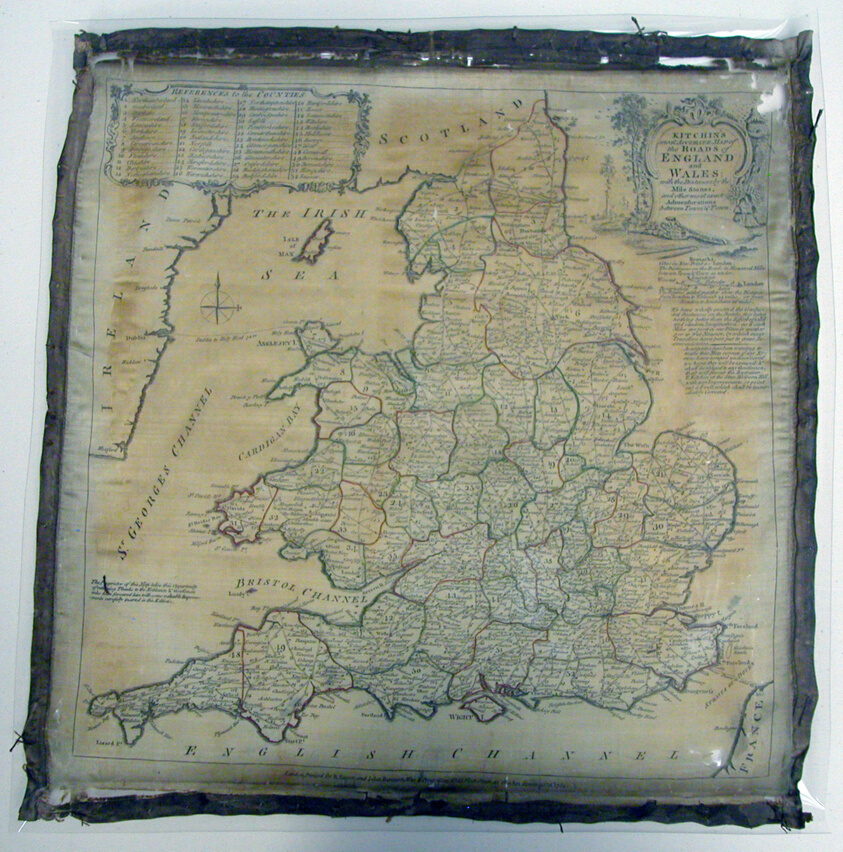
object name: Textile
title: Panel (Map)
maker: England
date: 1784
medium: Silk, plain weave; printed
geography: England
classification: textile; weaving - printed; map; furnishing textile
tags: propaganda